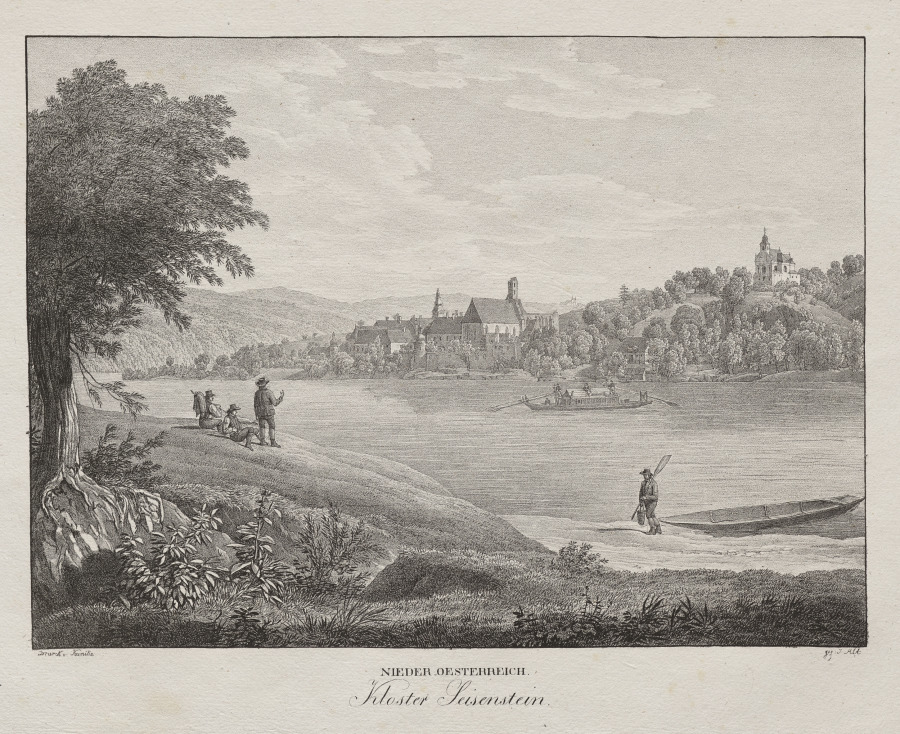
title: Nieder-oesterreich, Kloster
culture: Austria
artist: Jakob Alt (Austrian, 1789–1872)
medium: lithograph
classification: Print